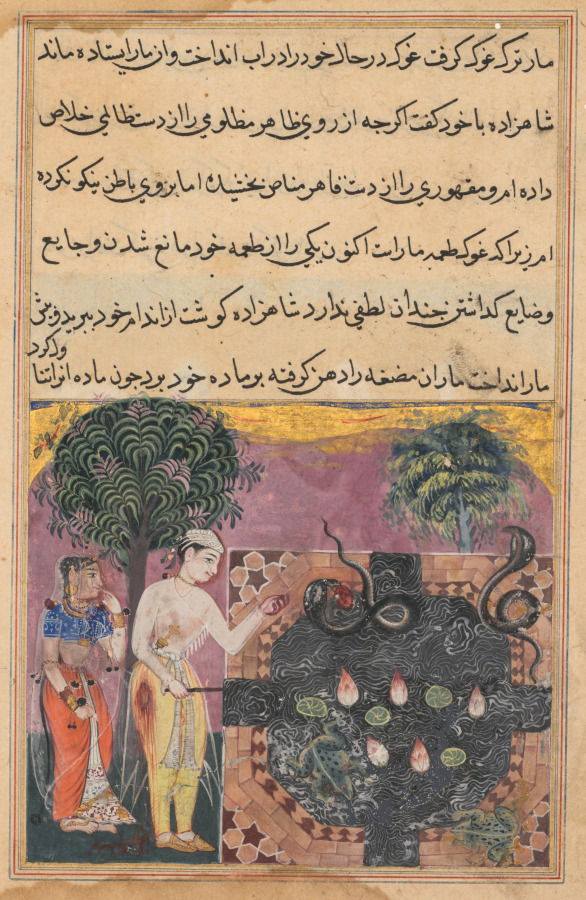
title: The prince, having deprived the snake of its natural food, a frog, feeds it with a piece of his own flesh, from a Tuti-nama (Tales of a Parrot): Eighteenth Night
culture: Mughal India, court of Akbar (reigned 1556–1605)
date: c. 1560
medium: gum tempera, ink, and gold on paper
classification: Painting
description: The prince and Good Fortune in the form of a woman came across a pool, here rendered with geometric tile work, tilted up so that the viewer can see it as though from above. A cobra had caught a frog, who cried out for help. The prince freed the frog, who jumped into the water and rejoined his mate. The prince then cut a piece of his own flesh for the snake to eat instead. The wives of the snake and frog then admonished their husbands to return the favor.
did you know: The tree with red-tipped leaves is a mango tree.